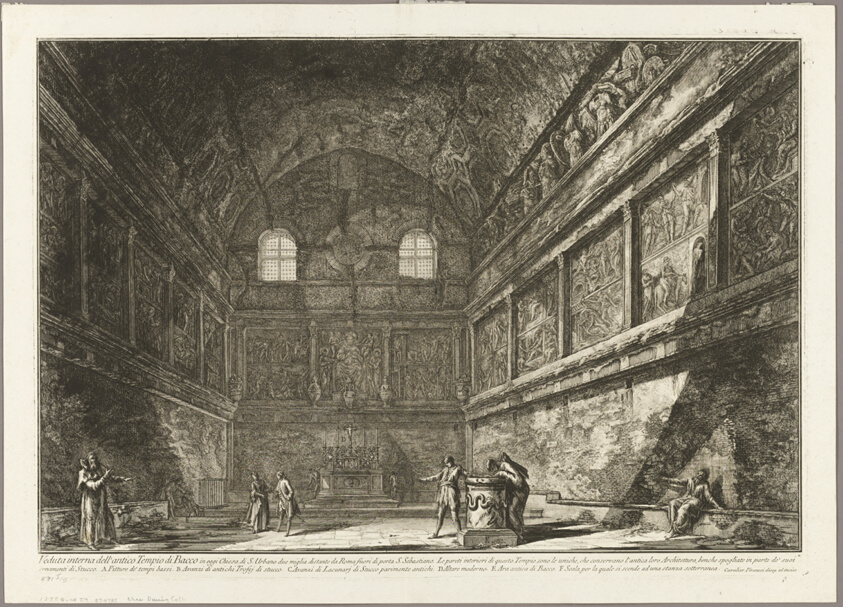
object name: Print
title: Interior view of the ancient Temple of Bacchus, now the church of S. Urbano, two miles from Rome, from Views of Rome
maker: Giovanni Battista Piranesi (Italian, 1720-1778)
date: 1767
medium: Etching on heavy ivory laid paper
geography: Italy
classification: etching; print; prints and drawing